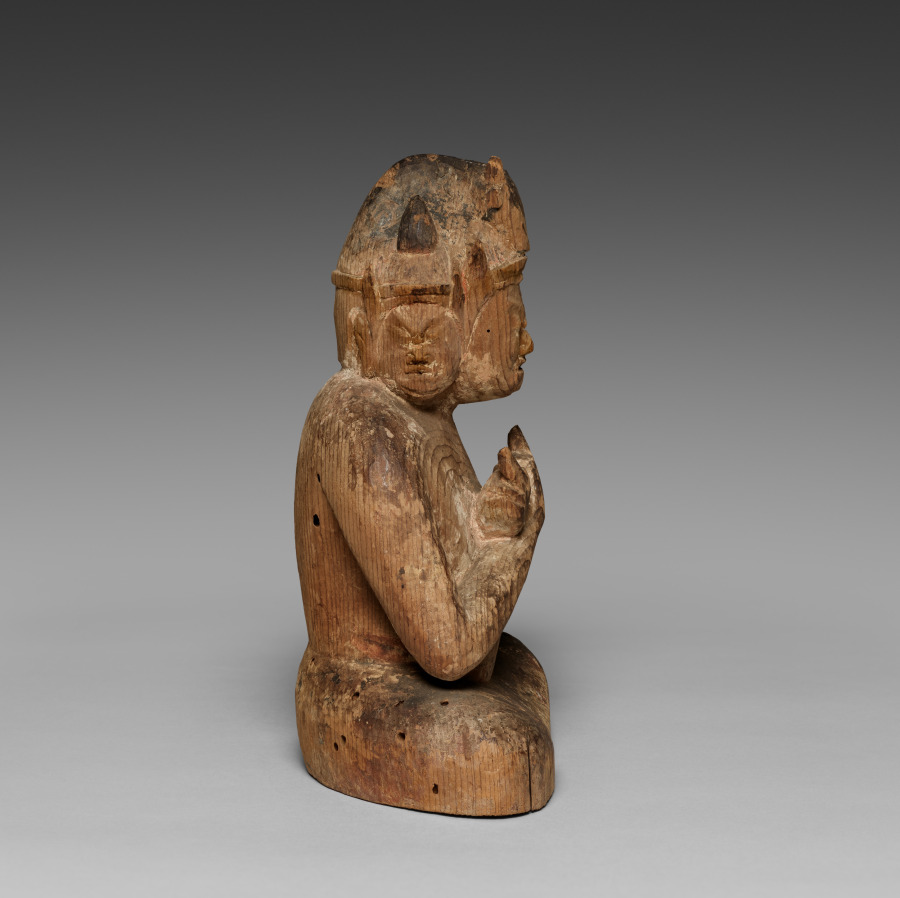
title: Gozu Tennō (Ox-Headed Plague Deity)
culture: Japan, Heian period (794–1185)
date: 1100s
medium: Wood with traces of color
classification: Sculpture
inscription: Object has wood storage box made and inscribed by former owner, sculptor Hirakushi Denchū (1872–1979). Inscription on face of box lid reads: Gozu Tennō sonzō (sculpture of Gozu Tennō [Ox-Headed Deity of Plague] 牛頭天王尊像); inscription on inside of box lid reads: made in the latter part of the Heian period, respectfully inscribed by Hirakushi Denchū [age] 99, February 1970 (平安朝後期作昭和四十五年二月 九十九 平櫛田中 拝題）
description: Gozu Tennō is a deity who is capable of both bringing epidemics and dispelling them. His name is literally “Ox-Headed Celestial King.” He usually has three heads with an ox-head rising above his primary face. He sometimes holds a lasso and sword or an ax, but here holds his hands in a powerful gesture that may be designed to repel illness or promote healing.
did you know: The Gion Festival in Kyoto is related to belief in Gozu Tennō.